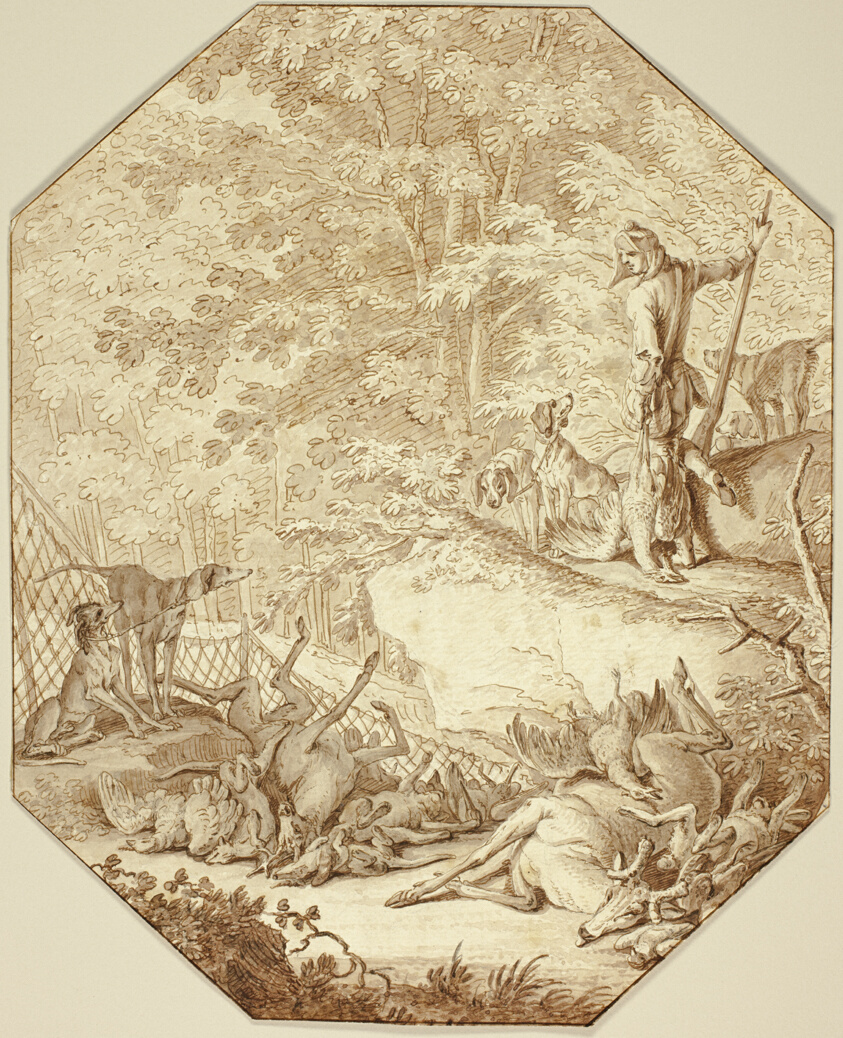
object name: Drawing and Watercolor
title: The Industrious Hunter, in Spring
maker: Johann Elias Ridinger (German, 1698-1767)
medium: Pen and brown ink, with brush and brown and gray wash, over graphite, on laid ivory paper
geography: Germany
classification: pen and ink drawings; prints and drawing; paper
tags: dogs, animals